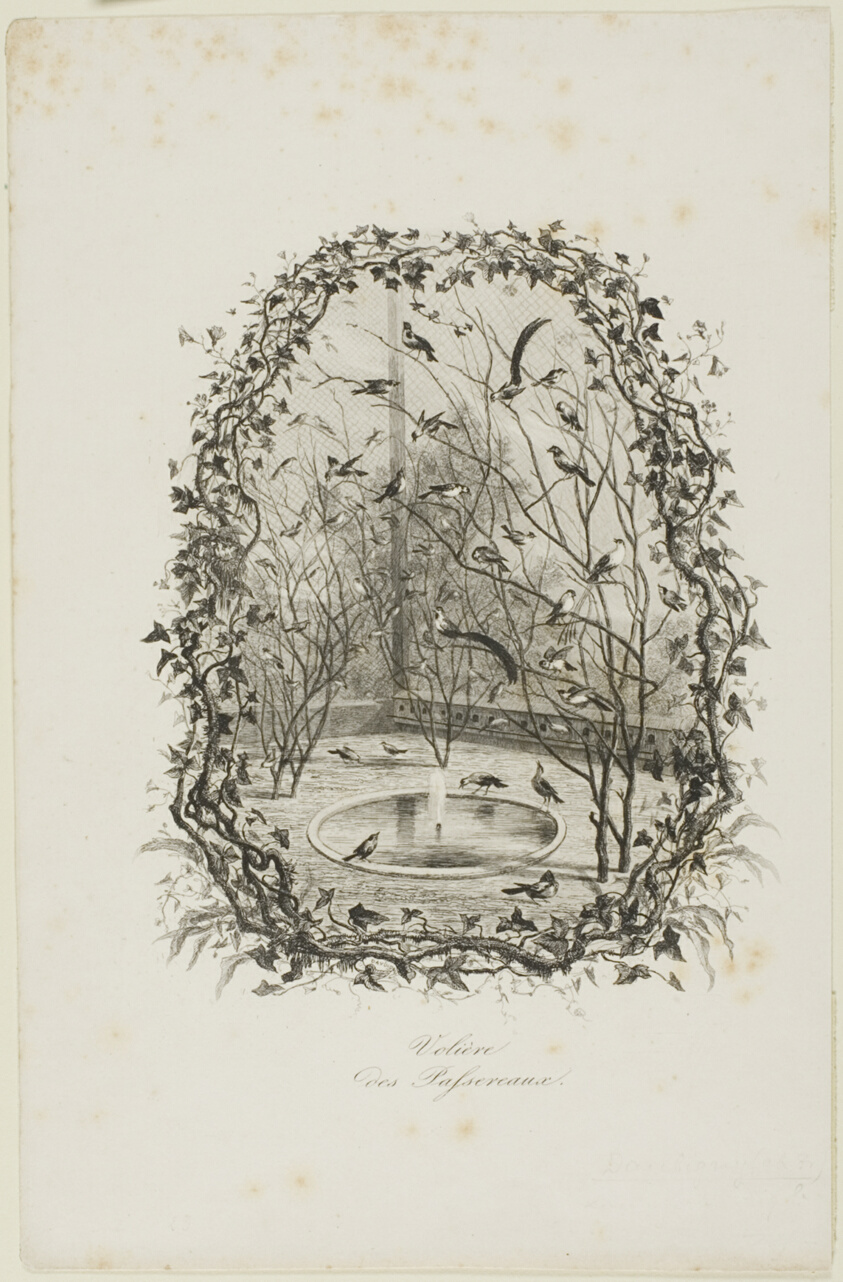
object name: Print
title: The Sparrow Aviary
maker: Charles François Daubigny (French, 1817-1878)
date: 1843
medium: Etching on white wove paper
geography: France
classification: etching; print; prints and drawing